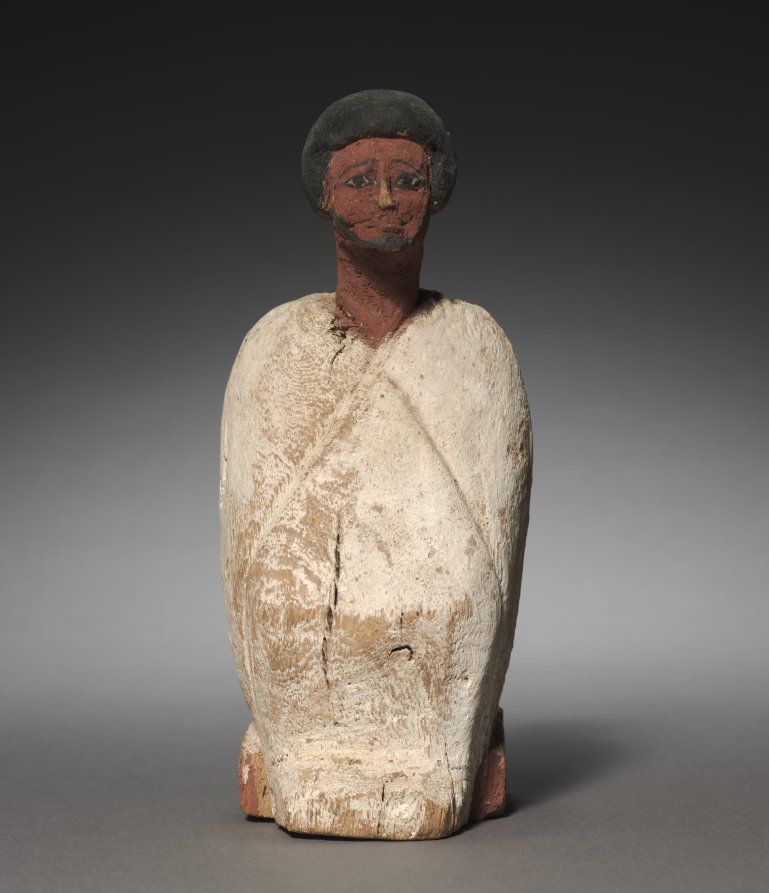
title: Model Boat Owner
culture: Egypt, Middle Kingdom (2040–1648 BCE), Dynasties 11–12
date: 2040–1648 BCE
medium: painted wood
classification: Funerary Equipment